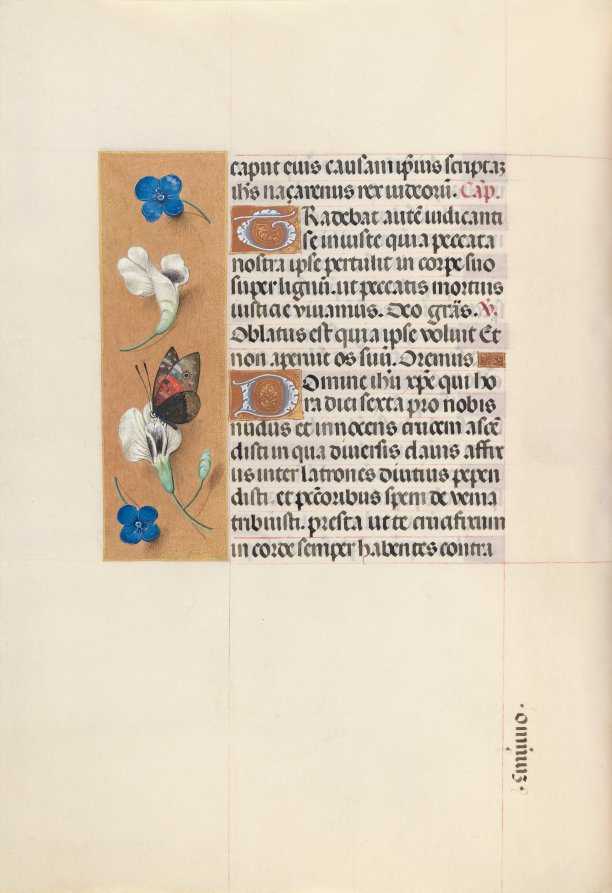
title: Hours of Queen Isabella the Catholic, Queen of Spain: Fol. 67v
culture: Flanders, Ghent and Bruges, late 15th century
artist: Master of the First Prayerbook of Maximillian (Flemish, c. 1444–1519)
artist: and Associates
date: c. 1500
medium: ink, tempera, and gold on vellum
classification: Bound Volume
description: This manuscript was illuminated by a circle of at least five highly organized manuscript painters active in the Flemish cities of Ghent and Bruges. The principal illuminator was Alexander Bening, who painted the majority of the book's miniatures. Manuscripts produced by this circle of artists are renowned for the decoration of their borders, which typically feature a rich variety of realistically-painted flowers, birds, and butterflies. This prayer book, called a book of hours, was intended not for a cleric, but for the private devotions of a lay person-in this case, Isabella the Catholic, Queen of Spain (1451-1504). Isabella's coat of arms embellishes the book's frontispiece. It is unlikely that the book was commissioned by the Queen herself; rather, she probably received it as a diplomatic gift from someone courting her patronage, perhaps Cardinal Francisco Jimenez de Cisneros. A Franciscan friar, Jimenez was dependent upon Isabella for his advancement, first to the post of Queen's confessor in 1492, and then to Archbishop of Toledo in 1495.